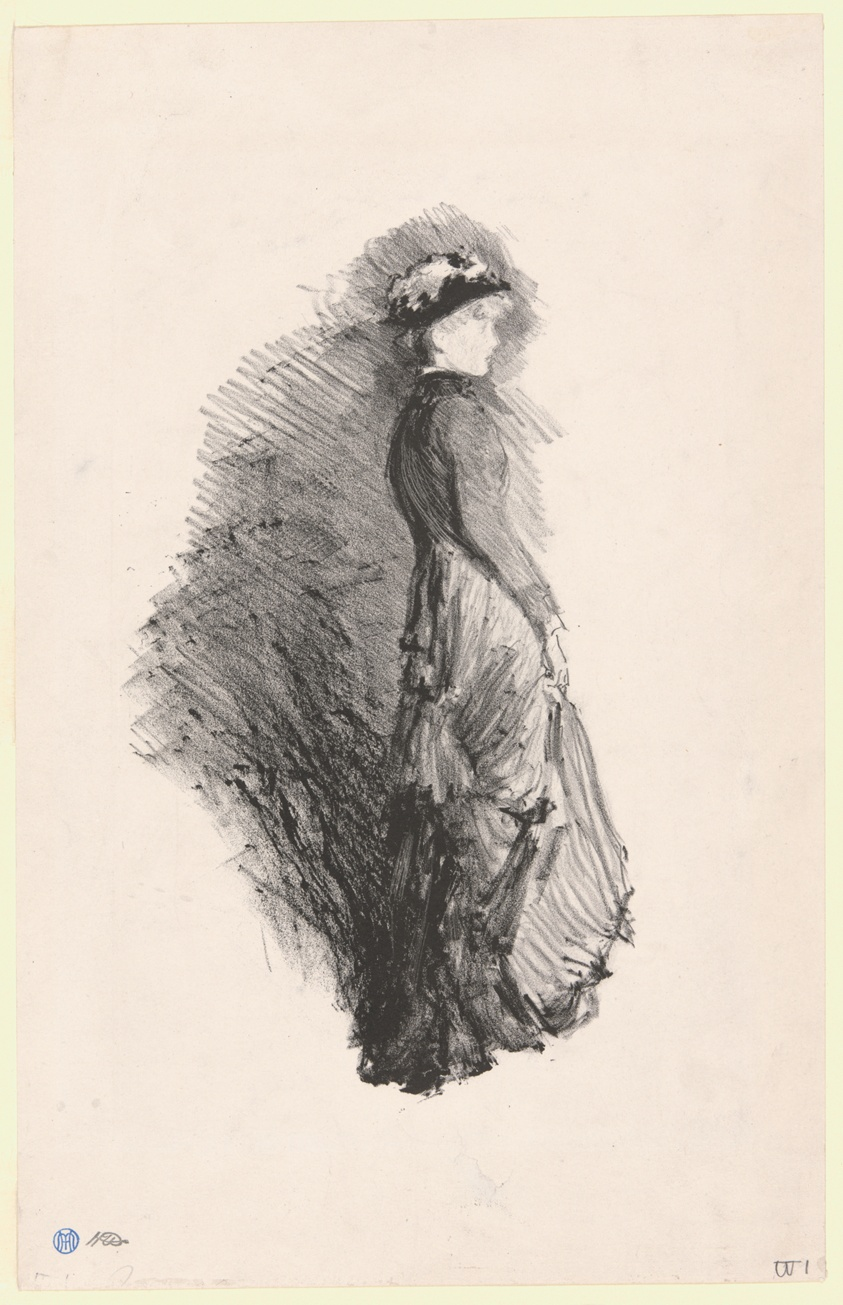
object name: Print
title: Study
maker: James McNeill Whistler (American, 1834-1903)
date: 1878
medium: Lithograph in black ink with scraping and roulette work on ivory plate paper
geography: United States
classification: lithograph; print; prints and drawing; paper